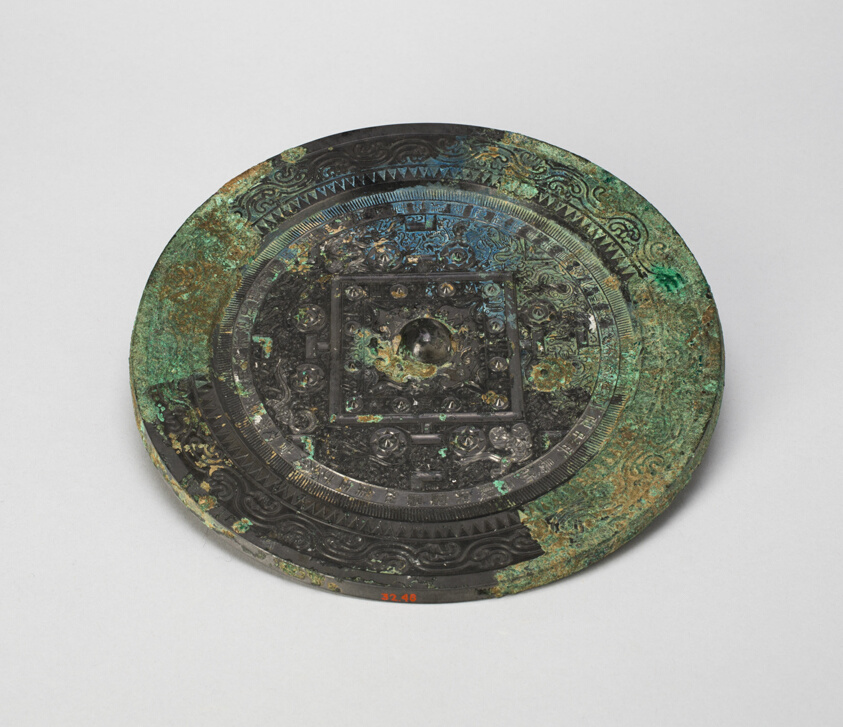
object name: Decorative Arts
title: Mirror with "TLV" Pattern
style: Chinese (culture or style)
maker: China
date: Eastern Han dynasty (25–220 CE), about 1st century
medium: Bronze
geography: China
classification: bronze; metal; mirror; asian art; decorative arts